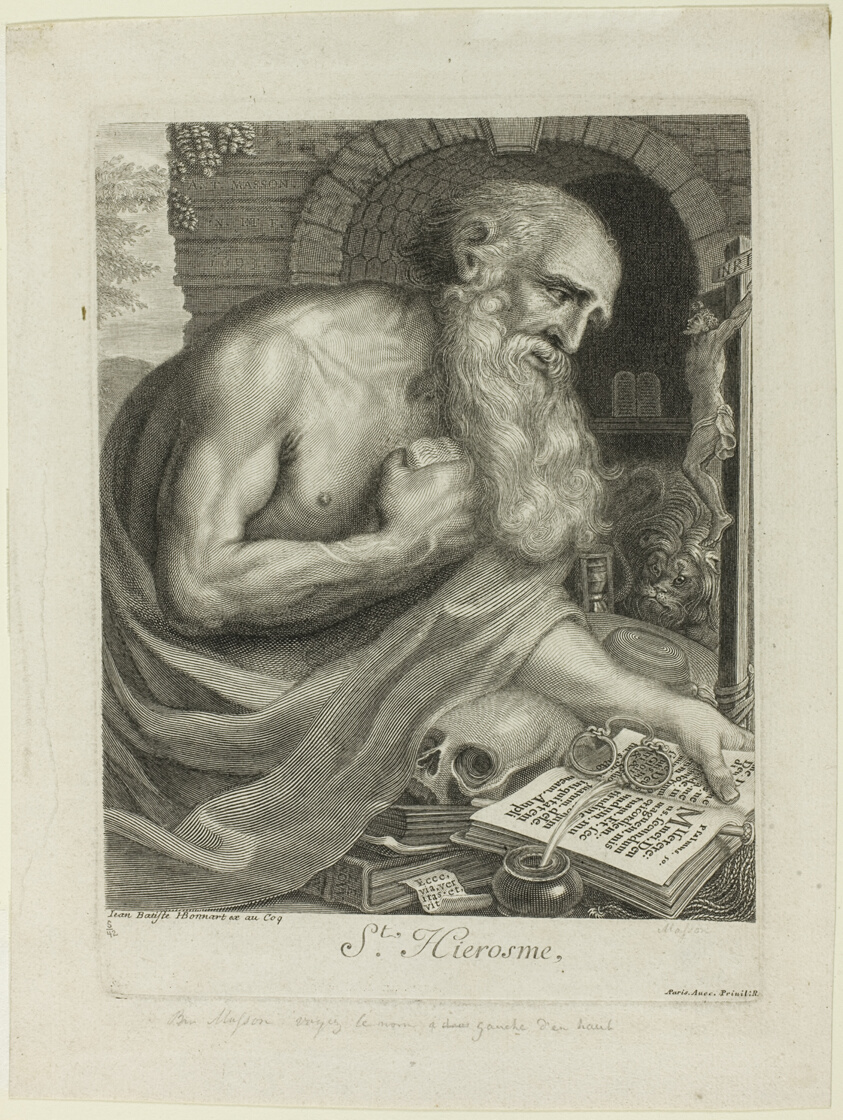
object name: Print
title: Saint Jerome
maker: Antoine Masson (French, 1636-1700)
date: 1693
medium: Engraving on ivory laid paper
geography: France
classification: engraving; print; prints and drawing